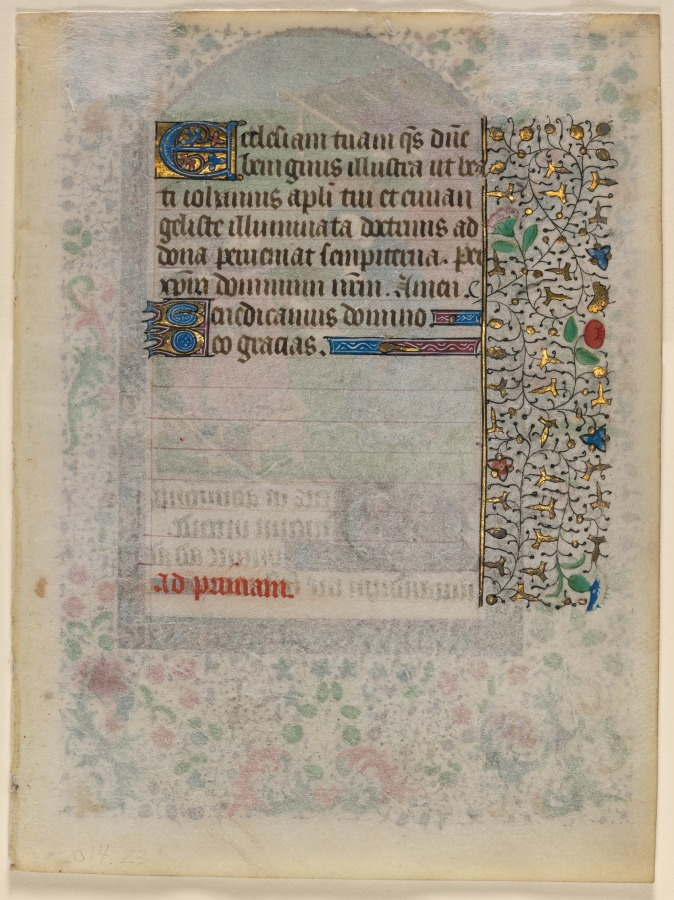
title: Leaf from a Book of Hours: Text (verso)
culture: Northeastern France, 15th century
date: c. 1430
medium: ink, tempera and gold on vellum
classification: Manuscript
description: Representing God's entry into the world, the Nativity remains one of medieval painting's most poignant Christian images. In the Gospels, only Matthew and Luke directly described this event. Perhaps the brevity and absence of detail in these texts allowed artists to devote so much creativity to amplifying the Christmas story. This miniature's simplicity makes it compelling. Only the three principals—Mary, Joseph, and the newly born Christ child—appear in the scene. The Virgin kneels before an elegant canopied bed made sumptuous by a richly embroidered textile, which stands in contrast to the nearby rustic fence and receding landscape. This scene probably follows the mystical visions of Saint Bridget of Sweden who visited Bethlehem in 1370, and whose written accounts circulated widely after her canonization in 1391: "When her time came she took off her shoes and her white cloak and undid her veil. . . . Then she made ready the swaddling clothes which she put down beside her. When all was ready she bent her knees and began to pray. While she was thus praying with hands raised the child was suddenly born, surrounded by a light so bright that it completely eclipsed Joseph's feeble candle."